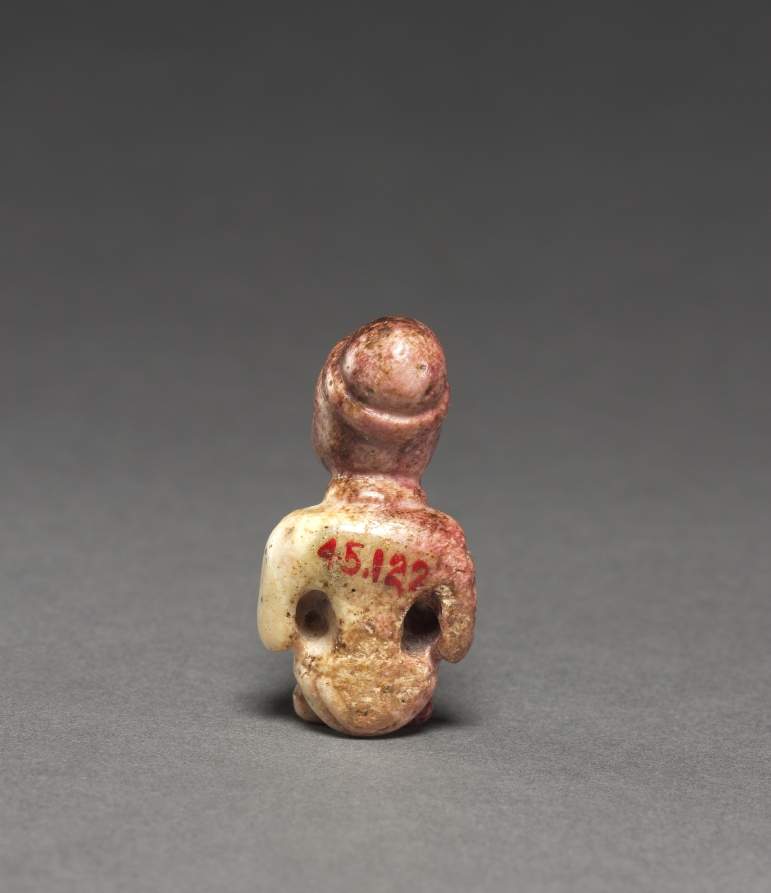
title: Seated Figurine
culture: Peru, Inca, 15th-16th century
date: c. 1400–1540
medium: stone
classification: Sculpture